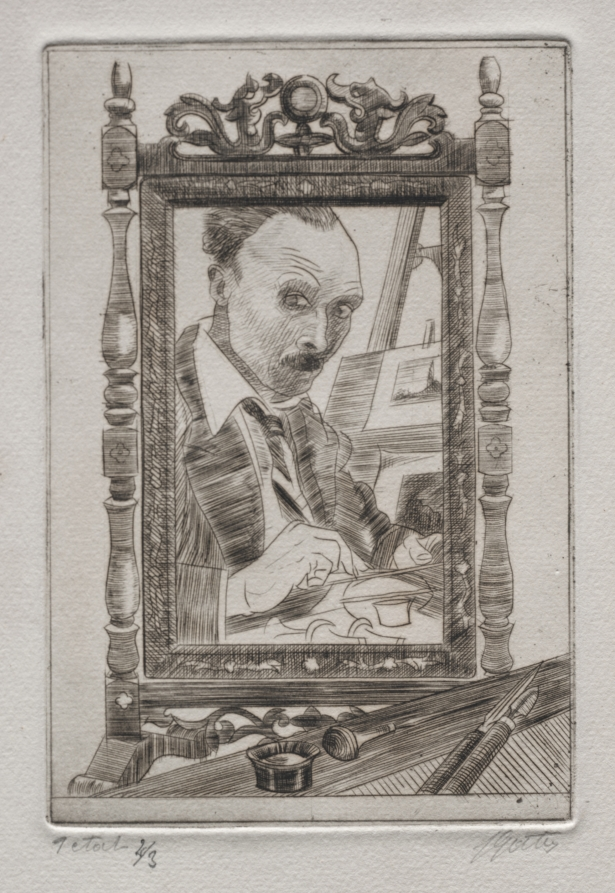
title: Self-Portrait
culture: France, 20th century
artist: Pierre Louis Gatier (French, 1878–1944)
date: c. 1925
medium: etching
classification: Print